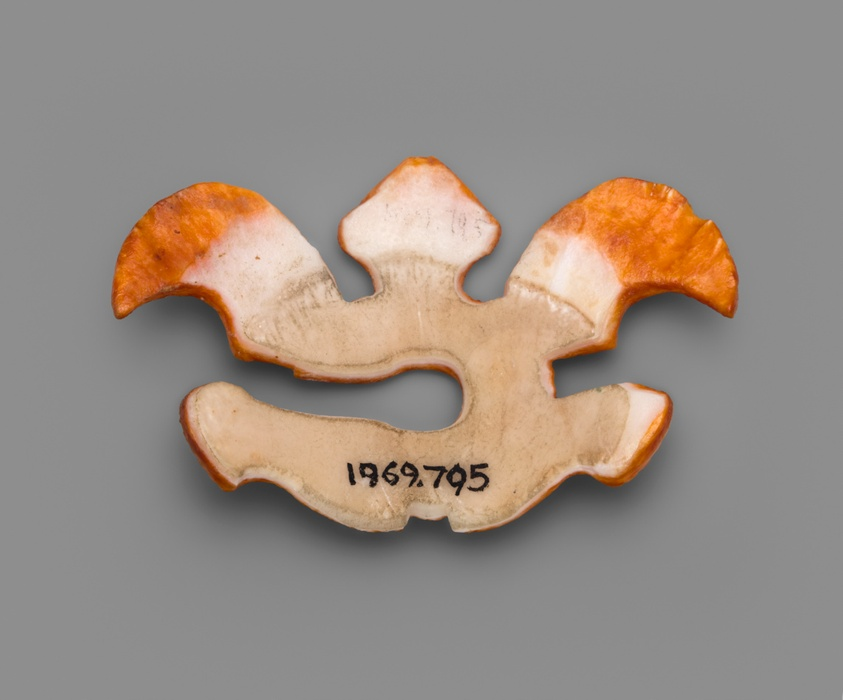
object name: Costume and Accessories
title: Nose Ornament in the Form of a Turtle with C-shaped Body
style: coclé, Pre-Columbian, americas, lower central america, Arts of the Americas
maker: Coclé (Venado Beach, Coclé province, Panama)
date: 800–1200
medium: Spondylus shell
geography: Venado Beach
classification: jewelry; shell; art of the americas; costume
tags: turtle, animals